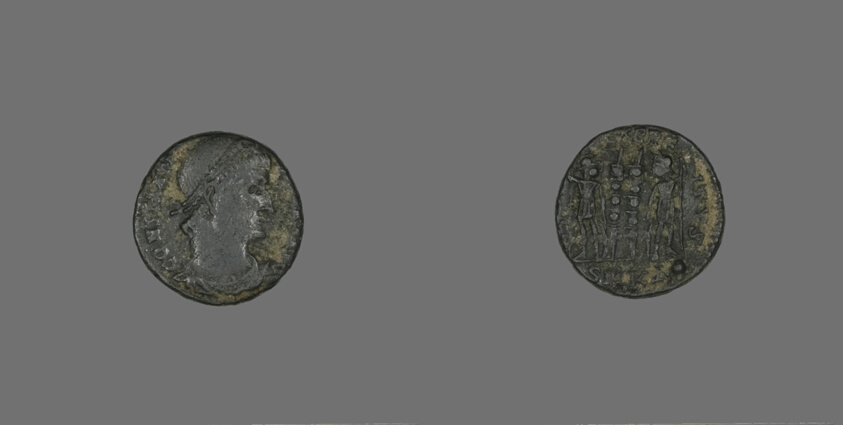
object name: Coin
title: Coin Portraying Emperor Constantius I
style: greco-roman, greco-roman (egyptian)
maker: Roman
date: 3rd-4th century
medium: Bronze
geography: Ancient Mediterranean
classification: coin; ancient art